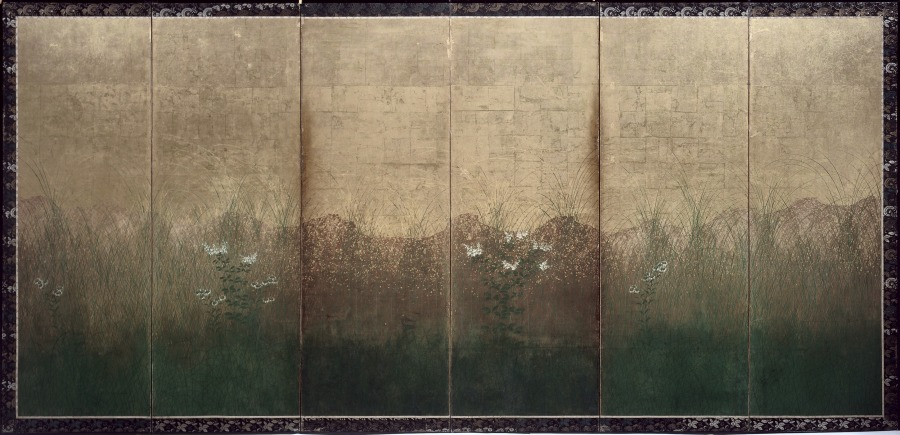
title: Autumn Evening with Full Moon on Musashino Plain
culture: Japan, Edo period (1615–1868)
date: early 1600s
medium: Pair of six-fold screens; ink, color, and gold and silver foil on gilded paper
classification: Painting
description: Tall grasses and autumn flowers reach out of thick green undergrowth in this depiction of the plain of Musashi, a site famous from classical Japanese poetry. A silver disc, now tarnished, represents the full moon. Flecks of cut-gold foil in the sky evoke the day’s passage into night. Once a wilderness with a vast horizon, Musashi is now densely populated.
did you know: The Musashino Plain is home to much of western Tokyo today.